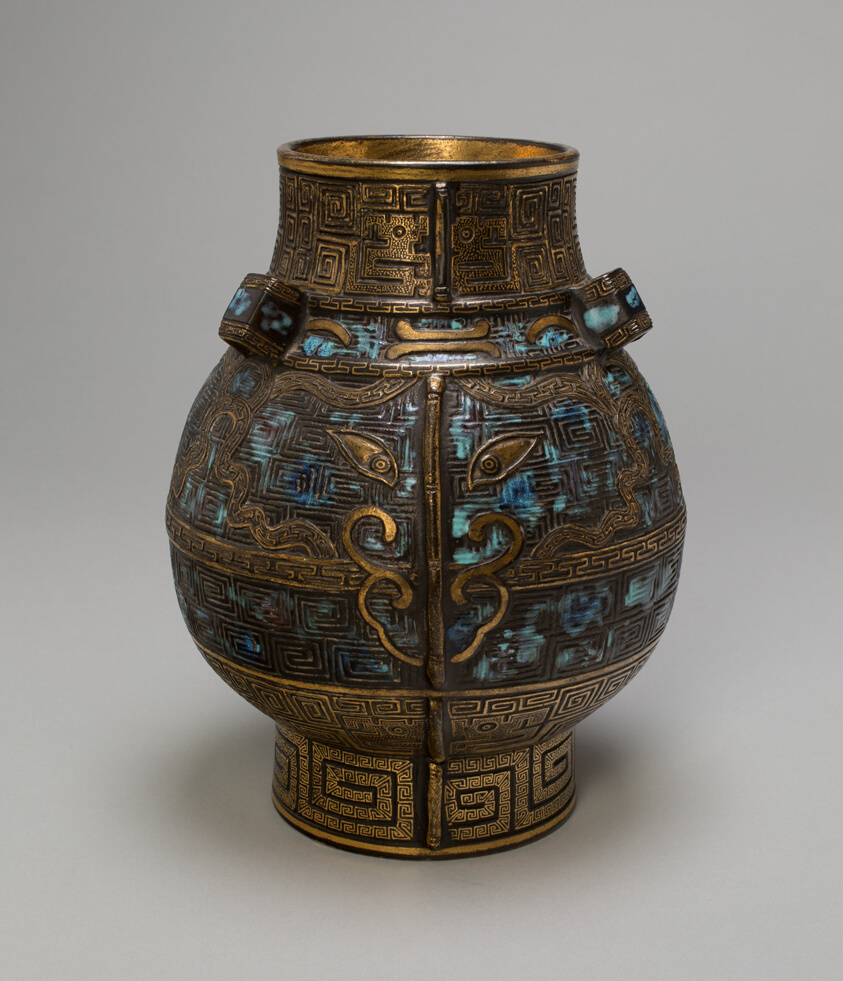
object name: Vessel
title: Jar in the Form of Ancient Bronze Vessel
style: Chinese (culture or style)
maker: China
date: Qing dynasty, Qianlong reign (1736–1795)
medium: Porcelain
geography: China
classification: vase; vessel; porcelain; ceramics; asian art